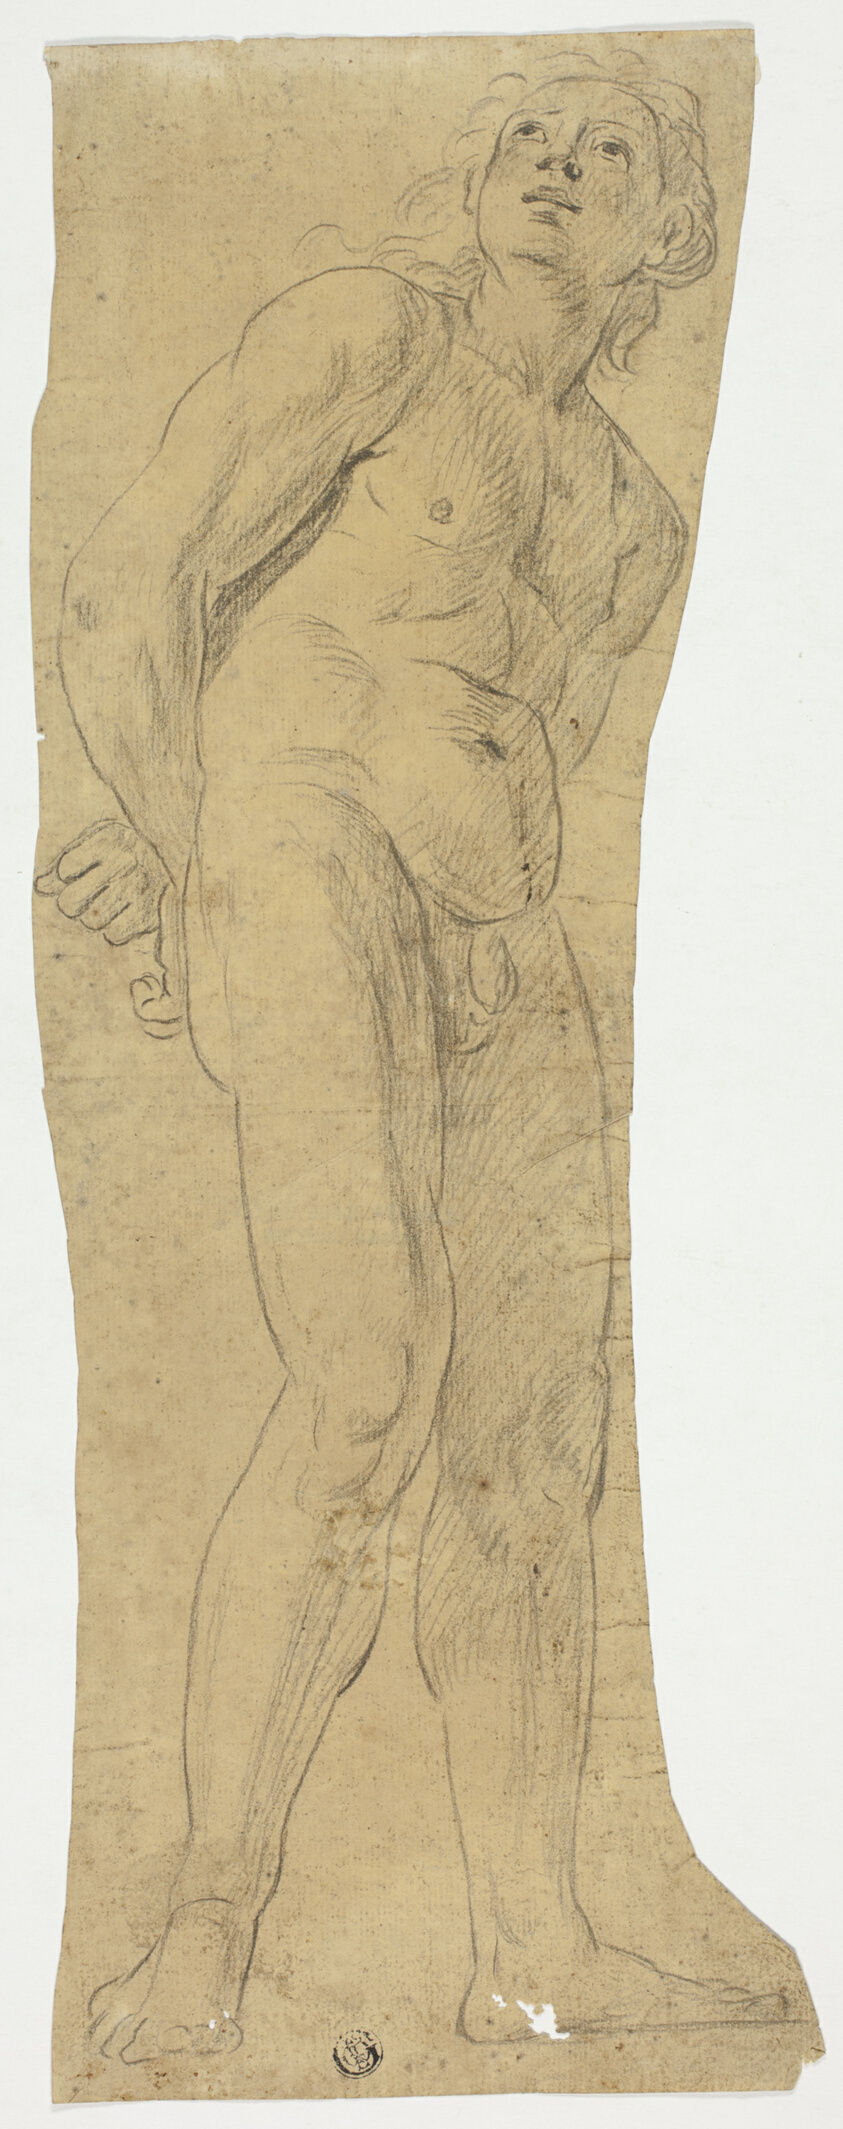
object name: Drawing and Watercolor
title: Saint Sebastian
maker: Unknown Artist; French, 1700-1799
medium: Graphite on tan laid paper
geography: France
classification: graphite; paper; drawings (visual works); prints and drawing